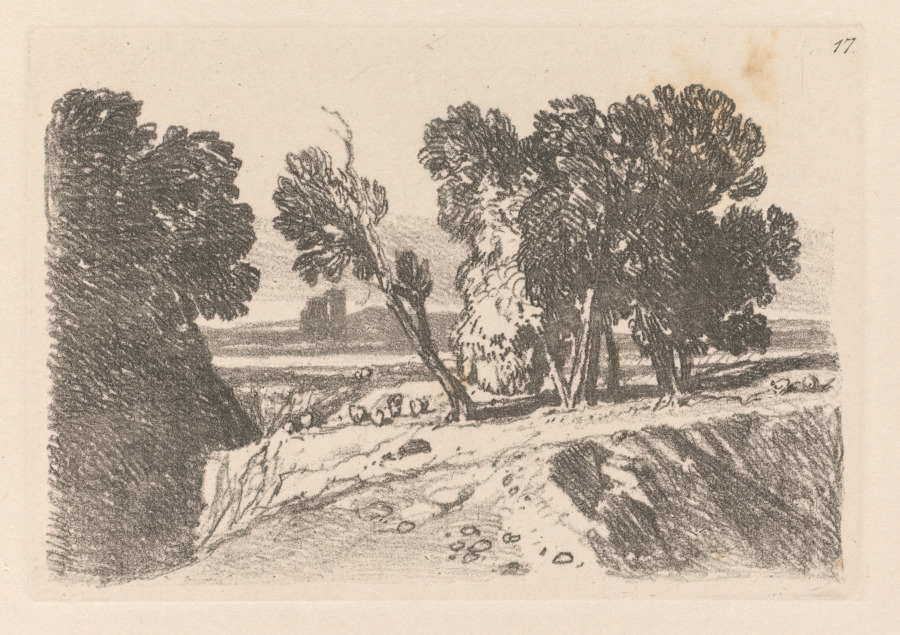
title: Liber Studiorum: Plate 17, A Study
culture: England, 19th century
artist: John Sell Cotman (British, 1782–1842)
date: 1838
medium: softground etching, from a bound volume containing 48 plates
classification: Bound Volume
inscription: In plate, within image, upper right: 17